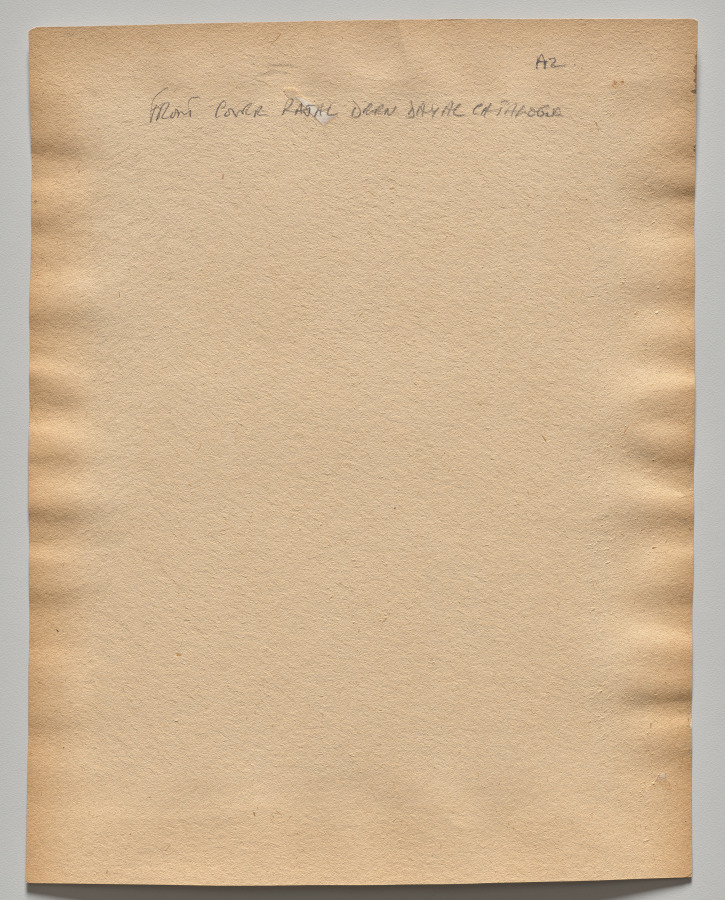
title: Mahmud Gawan Madrasa, Bidar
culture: India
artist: Raja Deen Dayal (Indian, 1844–1905)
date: c. 1890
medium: albumen print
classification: Photograph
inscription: Inscription lower left: "5435"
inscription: inscription along left edge of support: "Bidar Deccan the Madrassa Nov. ’97"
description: The architectural decoration on the tower echoes patterns on Bidri ware (see 2020.206), ornamented metallic vessels cast from condensed vapors of zinc in a technique native to that city. This image is notable for the precision and poetry with which the people are posed. Most gaze at the camera, probably instructed to do so by Deen Dayal; this is rarely the case in images by foreign photographers.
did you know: Built in 1472 as an Islamic theological college, in 1656 gunpowder stored in it ignited and gutted the building.